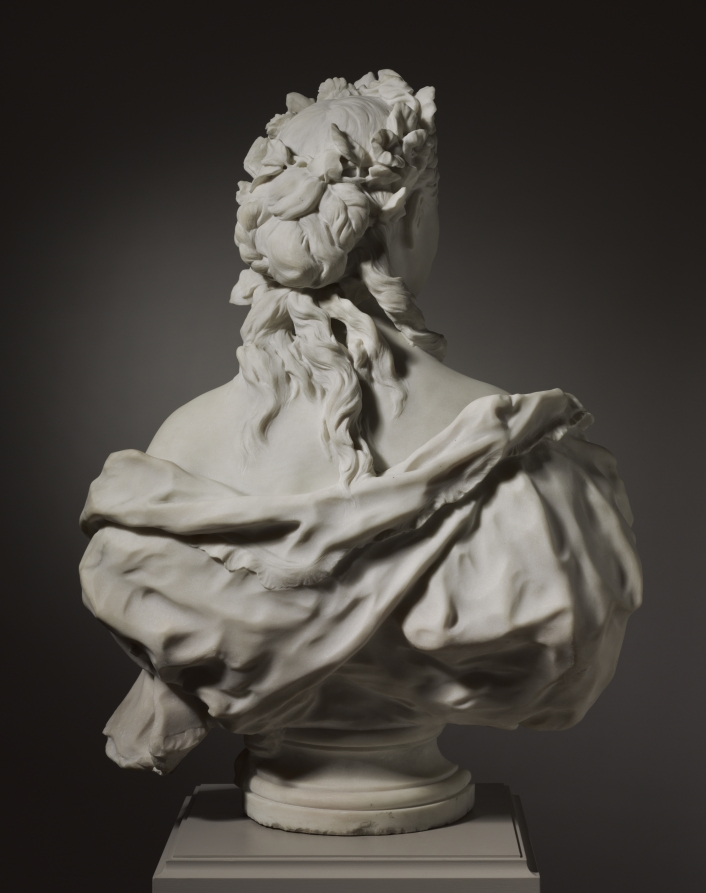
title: Bust of a Lady (possibly Fanny Coleman)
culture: France, 19th century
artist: Jean-Baptiste Carpeaux (French, 1827–1875)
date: 1872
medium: marble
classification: Sculpture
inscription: inscribed on base: J. Bte CARPEAUX 1872.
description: Abandoning the strict frontality and symmetry of the neoclassical style, Carpeaux was instead inspired by French portrait busts of the 1600s and 1700s. This bust probably depicts Fanny Coleman, an English actress with whom Carpeaux may have had a romantic relationship. The turn of the head and the undulating drapery infuse the figure with a sense of drama. Patronized by Napoleon III, Carpeaux created the celebrated figural group La Danse for the facade of the Opera Garnier in Paris, a work renowned for its sensual nudes, but denounced by contemporaries as an affront to public decency.